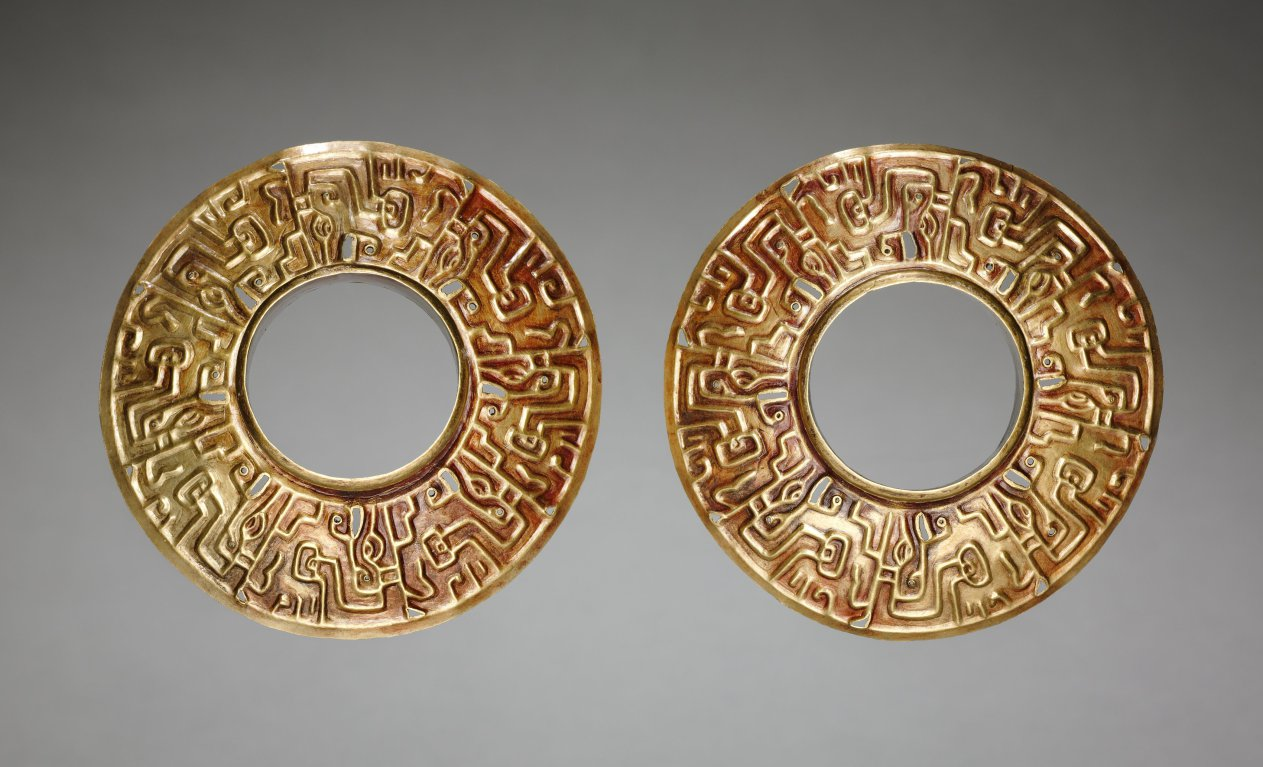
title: Pair of Ear Ornaments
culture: Peru, North Highlands, Chavín de Huantar(?), Chavín style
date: c. 500–200 BCE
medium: hammered and cut gold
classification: Metalwork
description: There seems to be a link between Chavín religion and appearance of the Andes’ first large precious-metal objects, made using revolutionary new metallurgical processes. Chavín may have developed these technical innovations to express the inexpressible, the "wholly other" nature of its religion. In many areas, elite men and women wore the ornaments as emblems of their ties to this religion, and eventually were buried with them. These 16 objects, along with three others not in the museum’s collection, are said to have come as a group from Chavín itself.